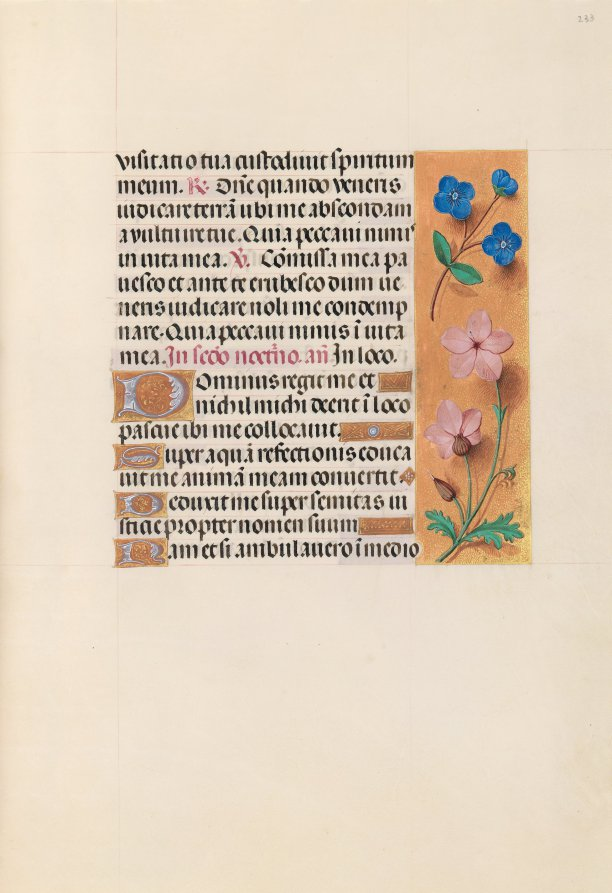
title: Hours of Queen Isabella the Catholic, Queen of Spain: Fol. 233r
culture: Flanders, Ghent and Bruges, late 15th century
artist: Master of the First Prayerbook of Maximillian (Flemish, c. 1444–1519)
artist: and Associates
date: c. 1500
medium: ink, tempera, and gold on vellum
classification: Bound Volume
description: This manuscript was illuminated by a circle of at least five highly organized manuscript painters active in the Flemish cities of Ghent and Bruges. The principal illuminator was Alexander Bening, who painted the majority of the book's miniatures. Manuscripts produced by this circle of artists are renowned for the decoration of their borders, which typically feature a rich variety of realistically-painted flowers, birds, and butterflies. This prayer book, called a book of hours, was intended not for a cleric, but for the private devotions of a lay person-in this case, Isabella the Catholic, Queen of Spain (1451-1504). Isabella's coat of arms embellishes the book's frontispiece. It is unlikely that the book was commissioned by the Queen herself; rather, she probably received it as a diplomatic gift from someone courting her patronage, perhaps Cardinal Francisco Jimenez de Cisneros. A Franciscan friar, Jimenez was dependent upon Isabella for his advancement, first to the post of Queen's confessor in 1492, and then to Archbishop of Toledo in 1495.